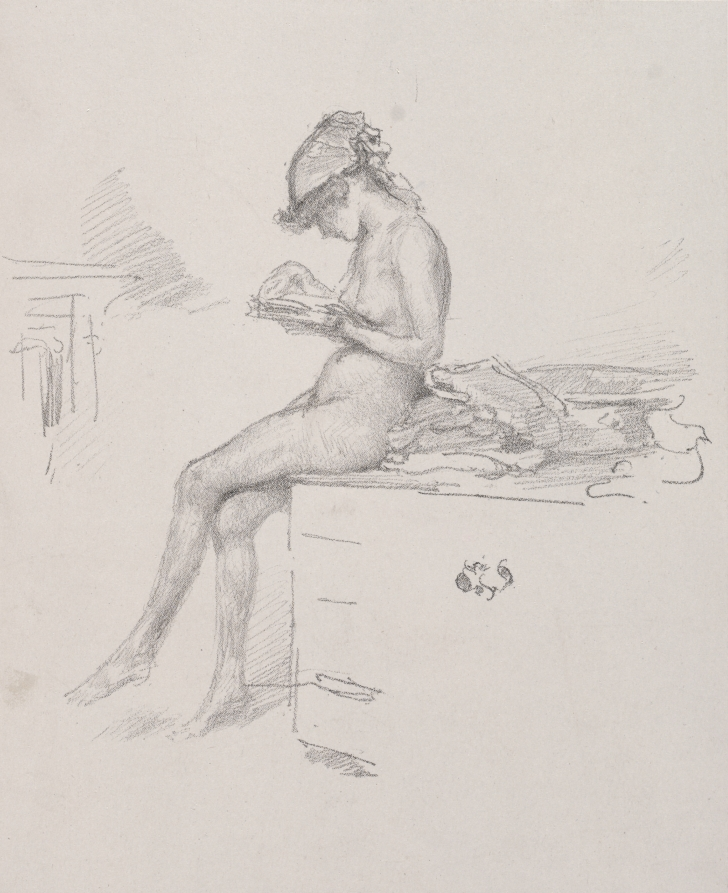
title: The Little Nude Model Reading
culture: America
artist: James McNeill Whistler (American, 1834–1903)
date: 1890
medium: lithograph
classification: Print